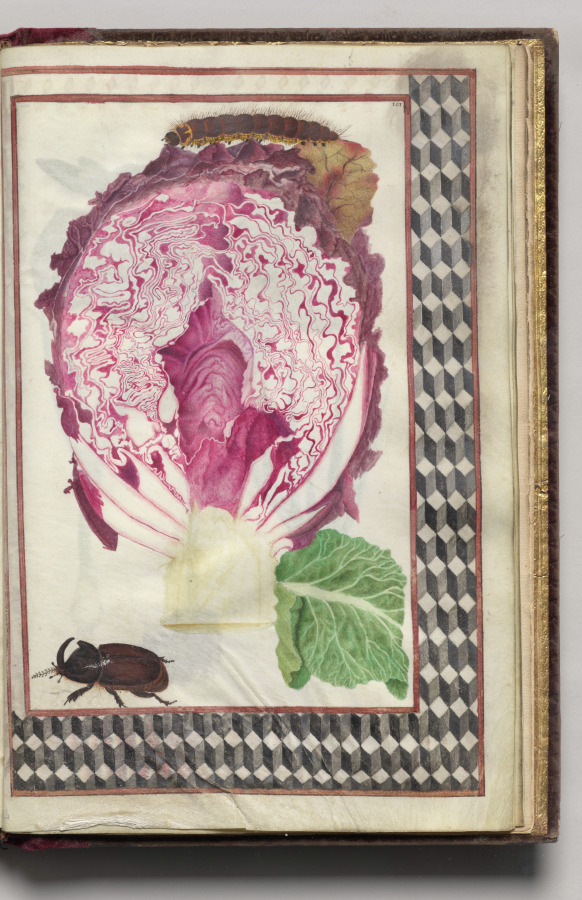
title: Cross Section of a Red Cabbage with a Beetle and Caterpillar with Geometric Border, folio 45 (recto), from Florilegium (A Book of Flower Studies)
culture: France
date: 1608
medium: watercolor, ink, silver, and gold over occasional traces of pencil, on vellum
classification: Bound Volume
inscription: Dated: Poitiers 1608 (on frontispiece) Signed: On frontispiece in black ink, lower right: Van Kuyk Notation on drawing: Frontispiece: in pencil, lower margin: * élève de Van Kessel, peintre flammand (* in pencil also appears in front of Van Kuyk's name).